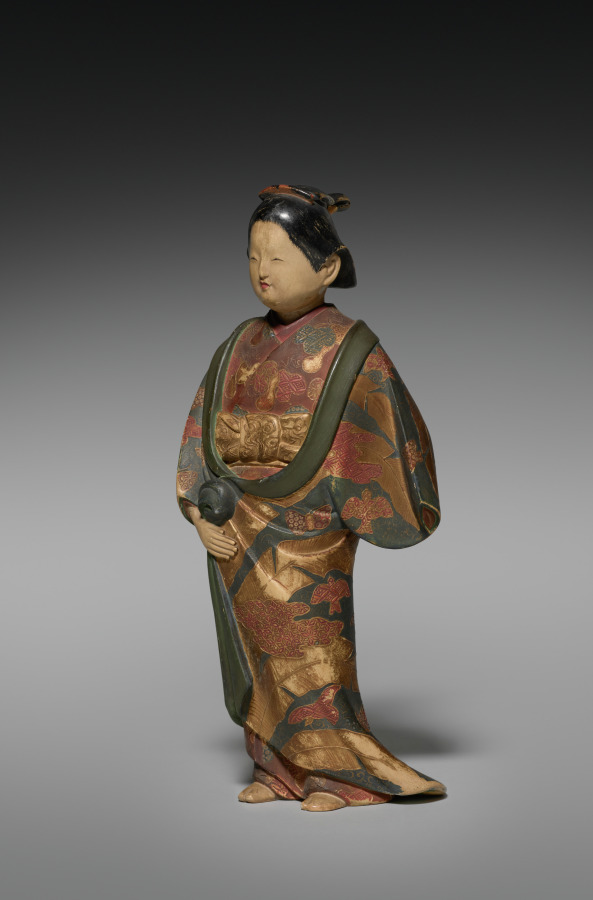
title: Saga Doll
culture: Japan, Edo period (1615–1868)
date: 1688–1703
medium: lacquered wood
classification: Sculpture